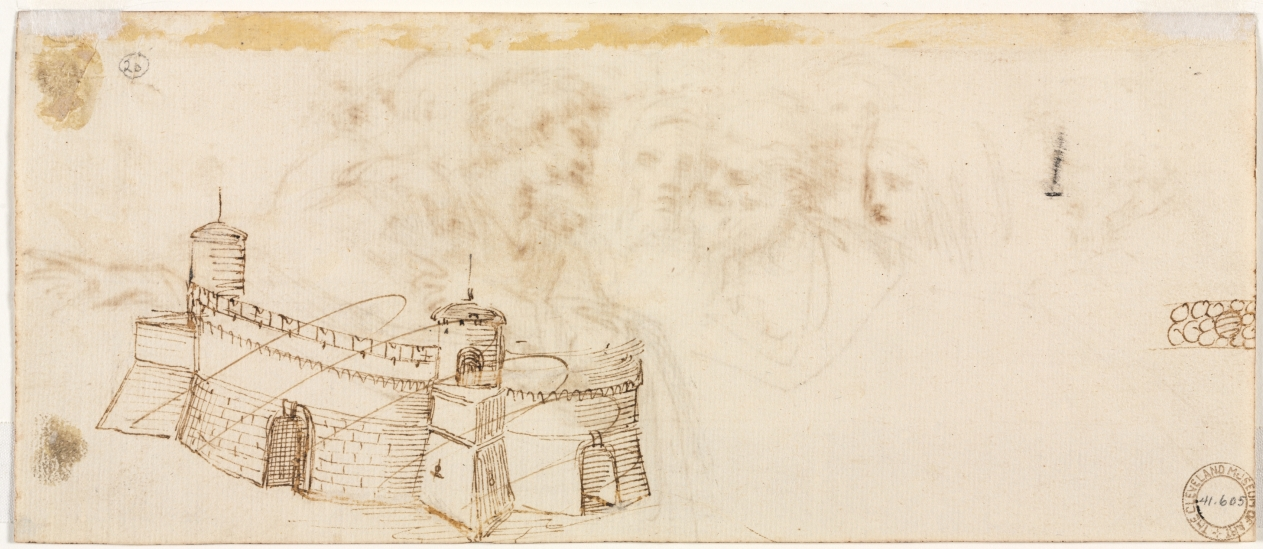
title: Crenelated Fortress (verso)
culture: Italy, second half 16th century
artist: Agostino Carracci (Italian, 1557–1602)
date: 2nd half 1500s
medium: pen and brown ink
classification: Drawing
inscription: upper left, in graphite: 20 [circled]